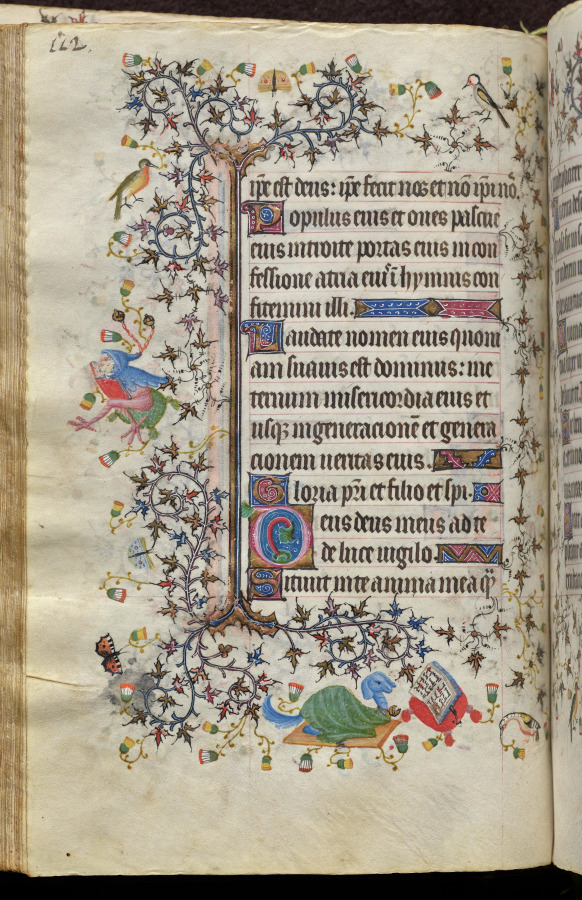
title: Hours of Charles the Noble, King of Navarre (1361-1425): fol. 56v, Text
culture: France, Paris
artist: Master of the Brussels Initials and Associates (French)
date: c. 1405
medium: ink, tempera, and gold on vellum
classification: Bound Volume